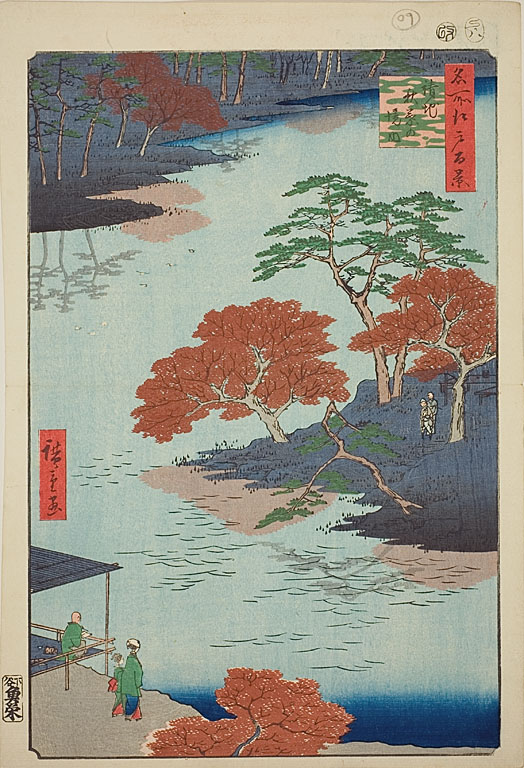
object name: Print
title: Precints of the Akiba Shrine, Ukeji (Ukeji Akiba no keidai), No.91 from the series "One Hundred Famous Views of Edo (Meisho Edo hyakkei)"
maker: Utagawa Hiroshige (Japanese, 1797-1858)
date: 1857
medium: Color woodblock print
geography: Japan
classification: woodblock print; print; asian art